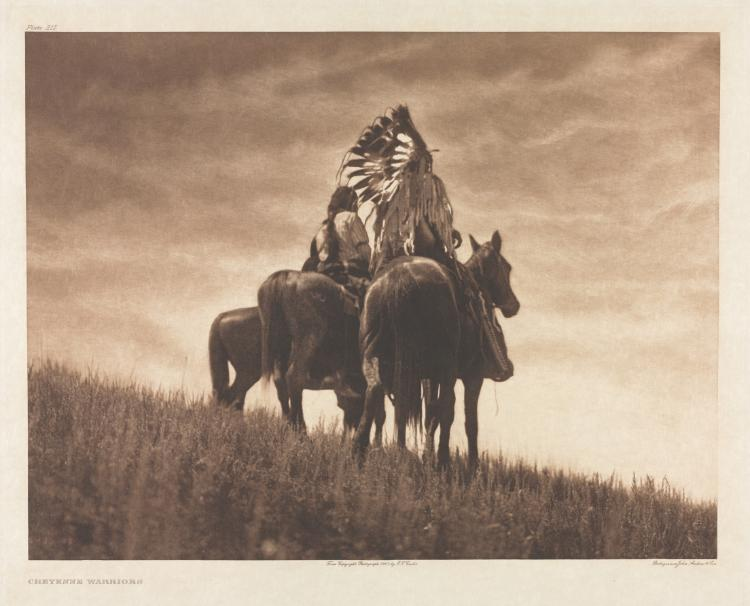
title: Portfolio VI, Plate 215: Cheyenne Warriors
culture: America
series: The North American Indian: being a series of Portfolios picturing and describing the Indians of the United States, the Dominion of Canada, and Alaska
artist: Edward S. Curtis (American, 1868–1952)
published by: The University Press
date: 1905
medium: photogravure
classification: Portfolio